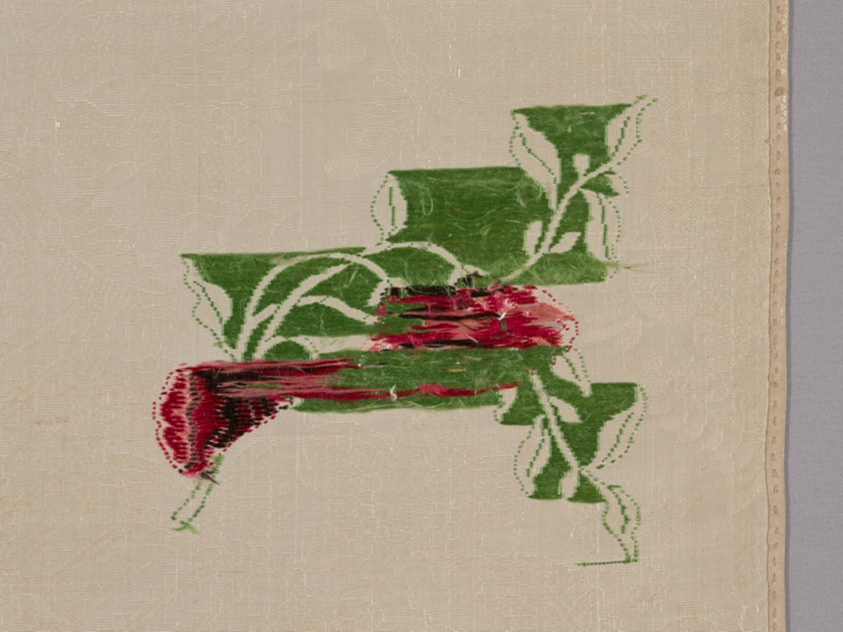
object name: Costume and Accessories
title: Skirt Panel for a Woman's Sack Gown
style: 18th Century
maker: Designed by Anna Maria Garthwaite (English, 1690–1763); Woven by Daniel Vautier (English, active 1741–51); Spitalfields, England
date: Design March 1, 1749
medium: Silk, plain weave foundation with supplementary patterning warps and supplementary brocading wefts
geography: England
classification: garment; weaving; textile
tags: flowers, foliage, floral motifs, vines, botanical/floral